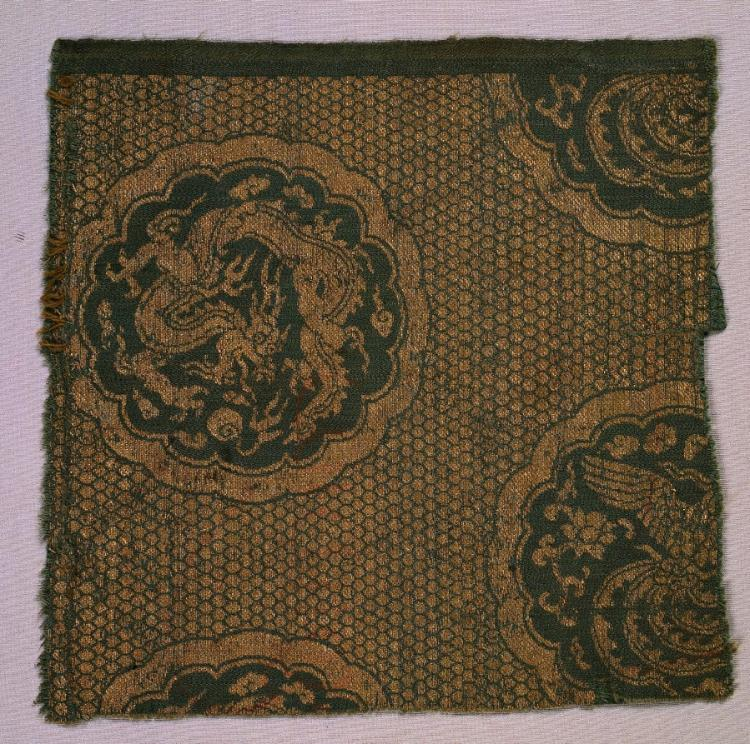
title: Textile with Phoenixes and Dragons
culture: China, Yuan dynasty (1260-1368)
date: 1279–1368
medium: Silk and gold thread; lampas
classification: Textile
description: This is one of the very few northern Chinese silk and gold textiles to have survived from the Yuan dynasty. The curled dragons chasing pearls, the phoenixes, and the background of tiny hexagons are Chinese motifs, but the lobed roundels enclosing the dragons and phoenixes indicate the influence of eastern Iranian craftsmen who had been relocated to northern China. A red and gold silk woven with the same pattern is preserved in Beijing. The extraordinary survival of the two silks demonstrates that patterns were typically used over and over.